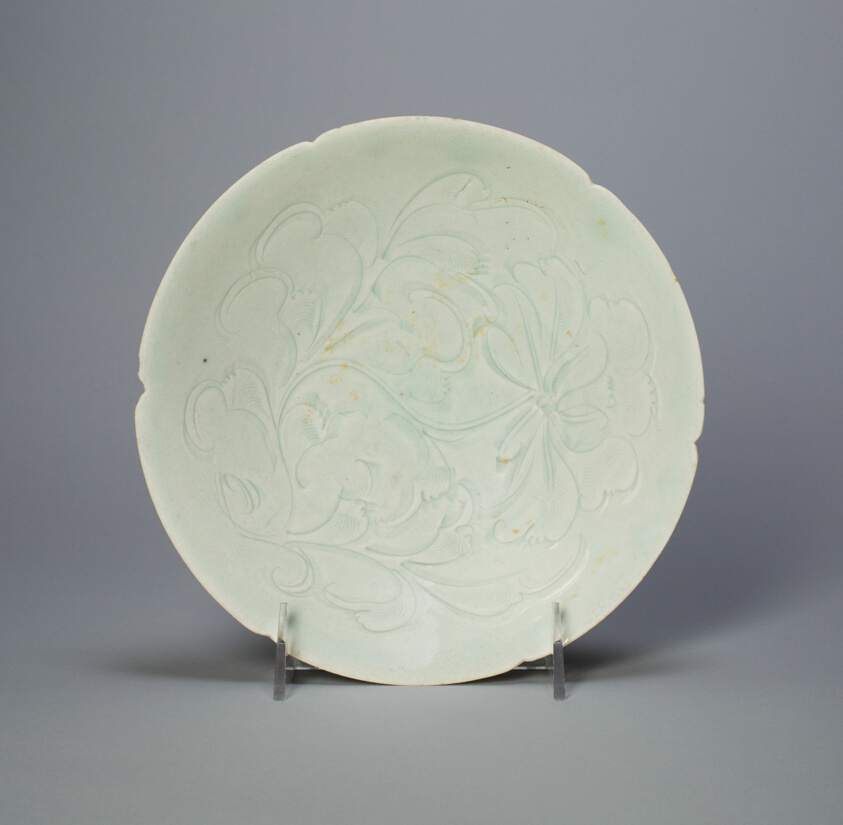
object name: Vessel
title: Foliate Bowl with Stylized Poeny Spray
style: Chinese (culture or style)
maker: China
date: Northern Song dynasty (960–1127), 12th century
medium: Qingbai ware; porcelain with underglaze carved decoration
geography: China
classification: bowl; porcelain; dish (vessel); asian art; ceramics; vessel